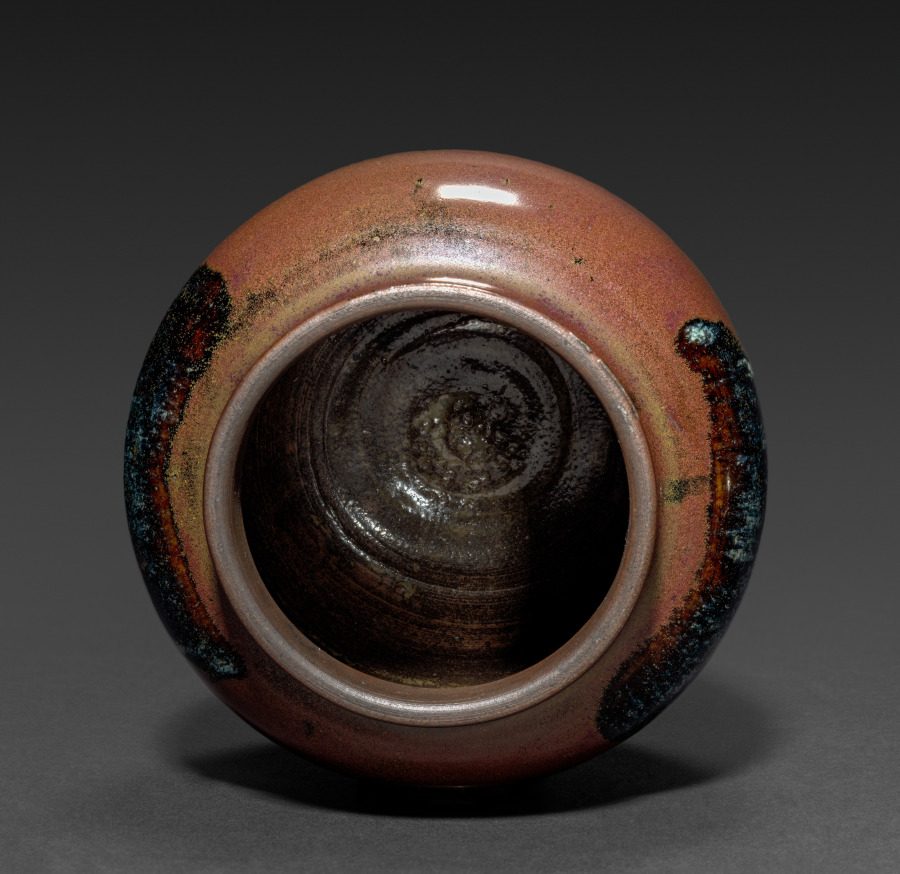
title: Jar with Wooden Cover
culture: Japan, Edo period (1615–1868)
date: 1700s-1800s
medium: pottery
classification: Ceramic